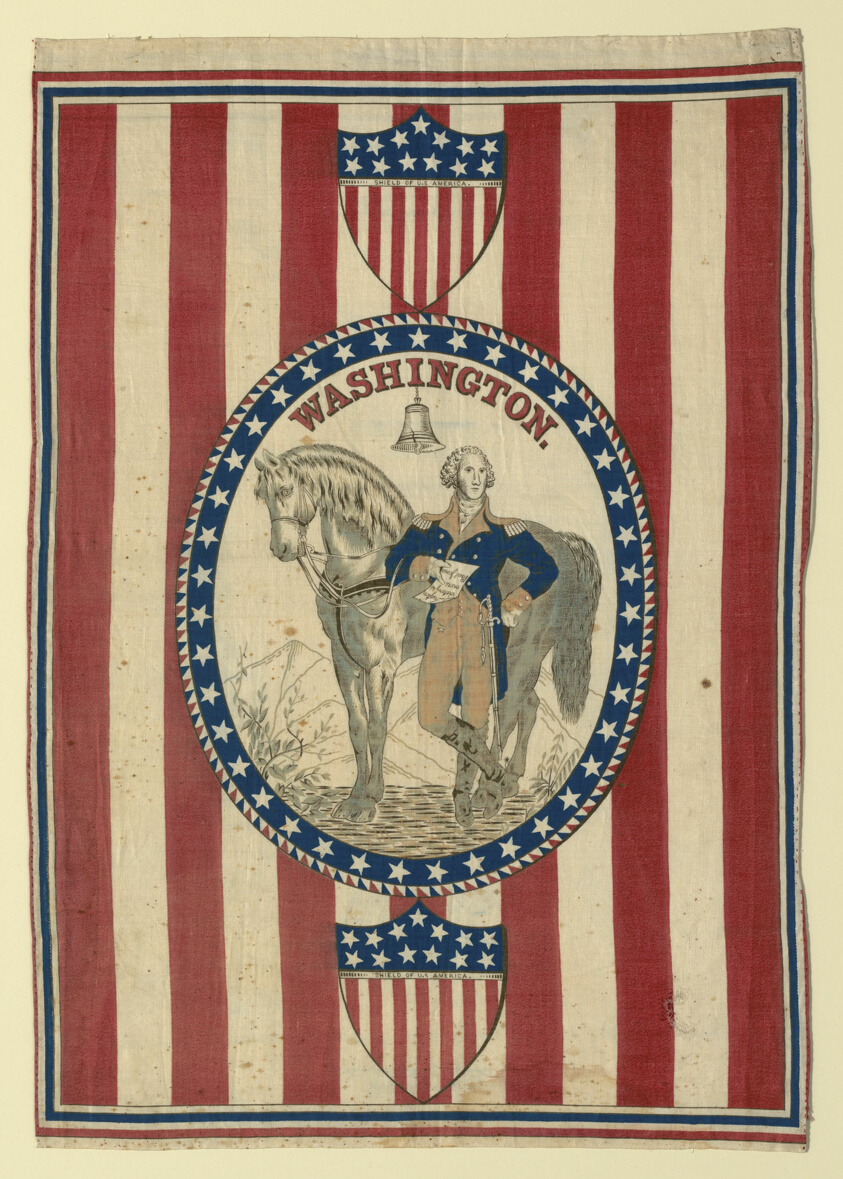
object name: Textile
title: Panel (Furnishing Fabric)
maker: United States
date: c. 1876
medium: Cotton, plain weave; roller printed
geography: United States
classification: textile; weaving - printed; furnishing textile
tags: propaganda